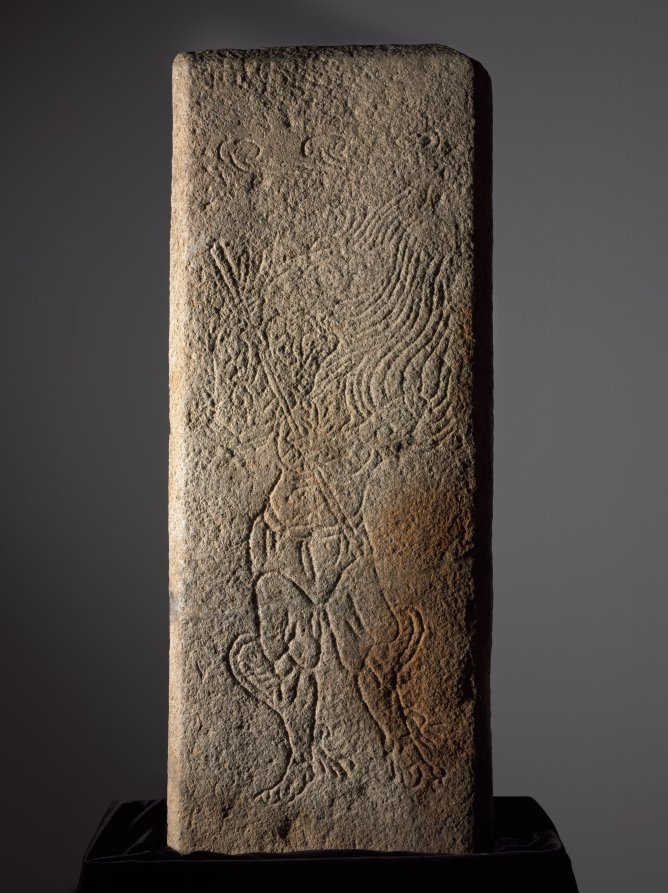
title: Stone Panel for Royal Tomb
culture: Korea, Unified Silla period (676-935)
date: late 700s-early 800s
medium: granite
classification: Sculpture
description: This panel shows a figure with a human body and the features of a rat, which is one of the signs of the Asian zodiac, and is likely one of 12 granite panels from a royal tomb. It is probably from Gyeongju—the capital of the kingdoms of the Silla (57 BCE–668) and Unified Silla (688–935) periods—where large royal tomb mounds can still be found. This panel resembles those showing the animal signs of the Korean zodiac from the tomb of General Kim Yusin (595–673) in Gyeongju, the most famous tomb of the period.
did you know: A rat, one of the signs of the East Asian zodiac, carved in this stone panel symbolizes wealth.